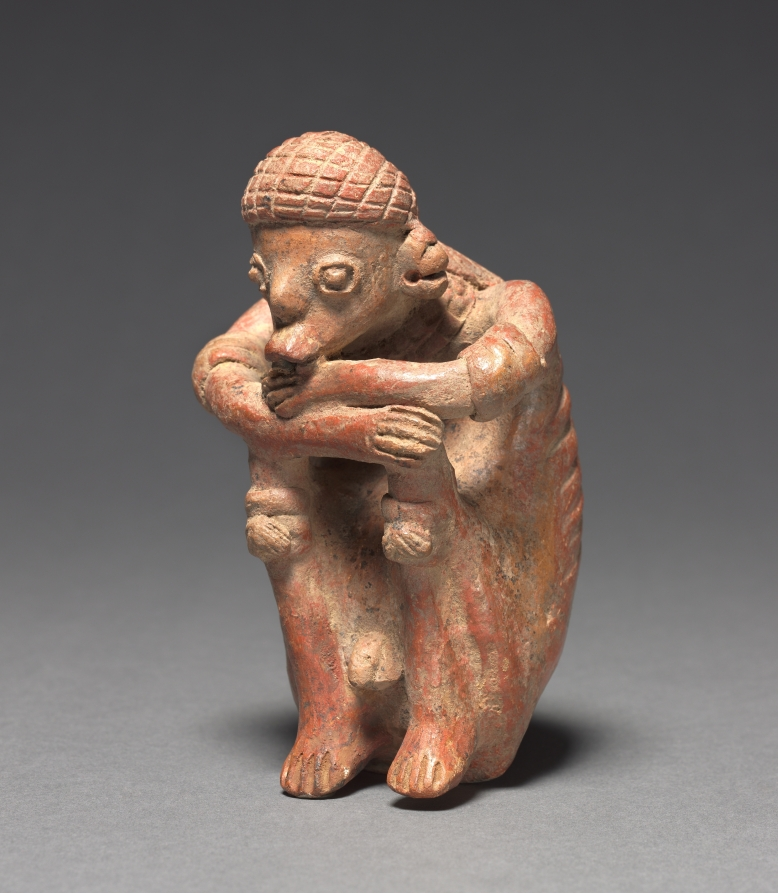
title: Emaciated Crouching Figure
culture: Mexico, Nayarit, San Sebastian Red Style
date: c. 100 BCE–300 CE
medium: earthenware with burnished red slip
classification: Sculpture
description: The protruding ribs and staring eyes of this melancholy figure may show the effects of a ritual fast, rather than famine. Fasting purified an individual in preparation for religious rites and may have enhanced the search for supernatural visions.